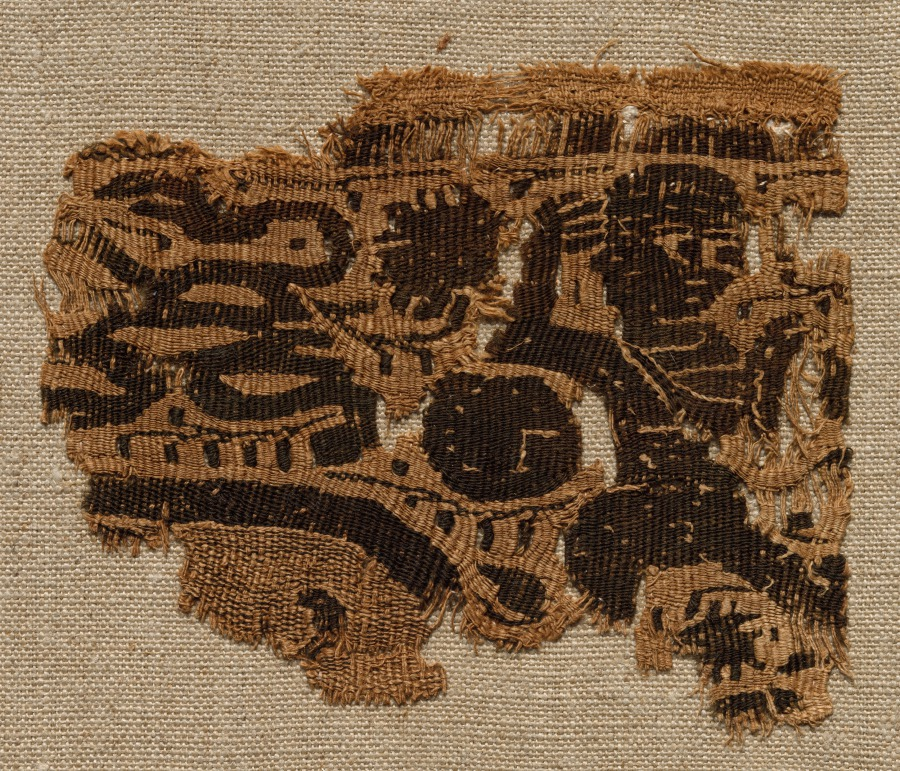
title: Fragment, Part of an Ornament from a Garment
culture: Egypt, Byzantine period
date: 500s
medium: tapestry (originally inwoven in tabby ground); linen and wool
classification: Textile